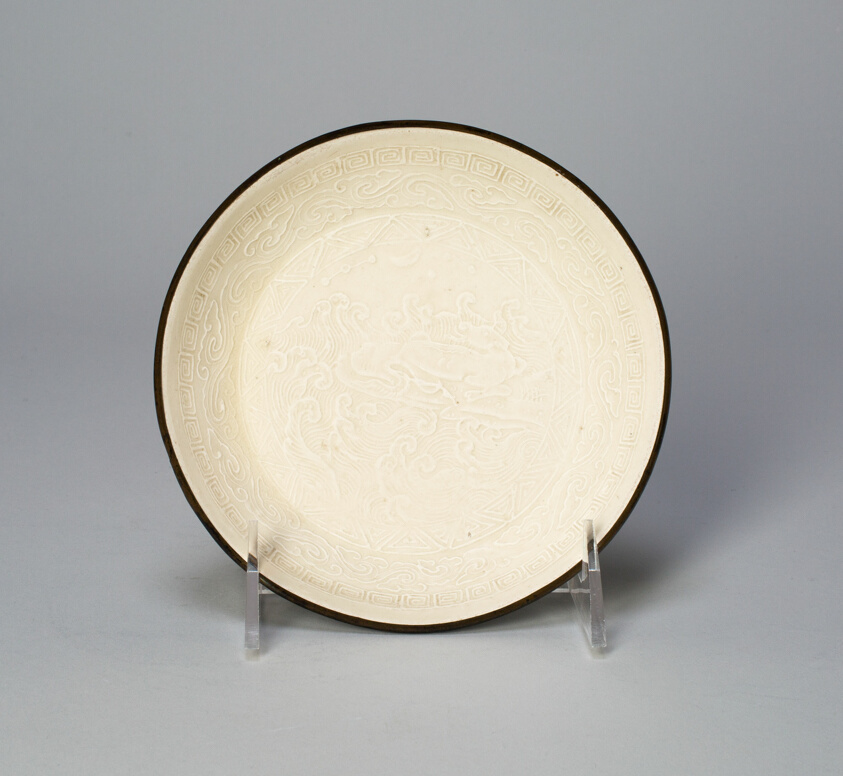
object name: Vessel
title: Dish with Mythical Bovine (Xiniu) Amid Waves Viewing the Moon and Constellations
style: Chinese (culture or style)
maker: China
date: Jin dynasty (1115–1234), 12th century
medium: Ding ware; porcelain with underglaze mold-impressed decoration; metal rim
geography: China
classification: dish (vessel); porcelain; asian art; ceramics; vessel